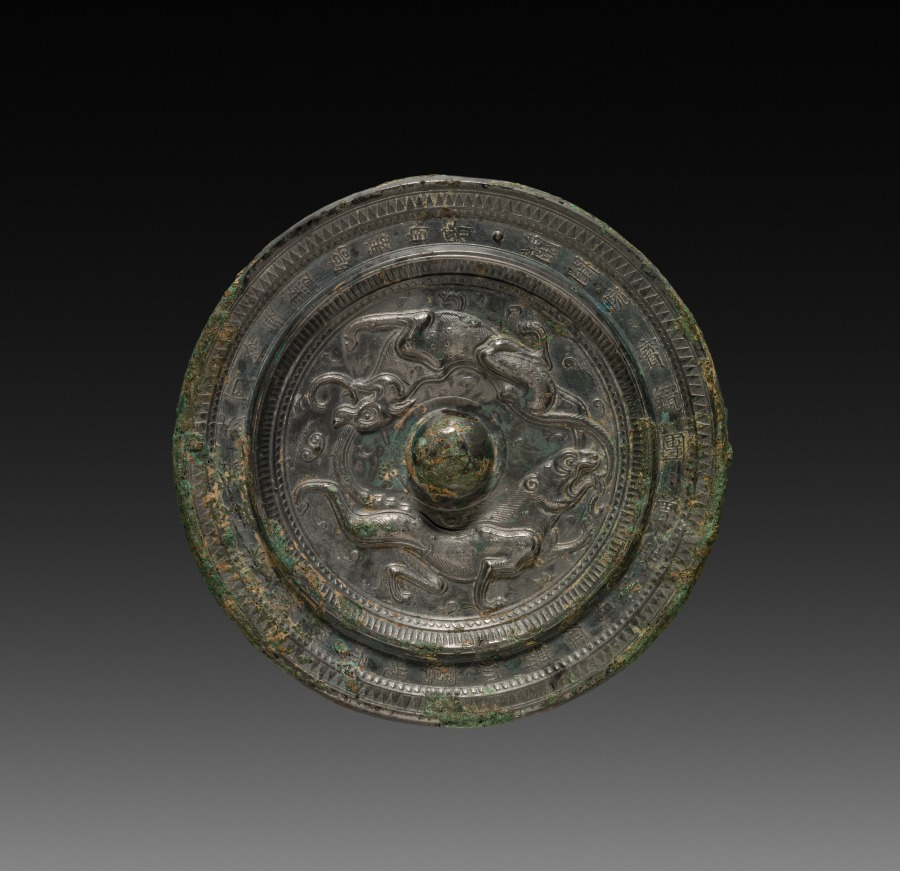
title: Mirror with Paired Felines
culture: China, Sui dynasty (581-618) - Tang dynasty (618-907)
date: late 500s–600s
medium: bronze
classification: Metalwork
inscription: The maiden's chamber---bright and clear Her precious mirror---round It has doubled both her eyes As she danced with the lonely phoenix. Its light flows over her powdered face, painted brow Diffusing radiance upon her silken gauze While with infinite delicacy She demurely glances at herself.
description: The two leopard-like creatures stalking each other around the knob of this mirror display a naturalistic animal style that emerged with the Sui and Tang unification of China. Their constrained energy contrasts markedly with the reserved image of a young woman described in the encircling poetic inscription: The maiden's chamber—bright and clear Her precious mirror—round It has doubled both her eyes As she danced with the lonely phoenix. Its light flows over her powdered face, painted brow Diffusing radiance upon her silken gauze While with infinite delicacy She demurely glances at herself. Unlike the tightly integrated Han mirrors, examples of the Sui and Tang are typically inscribed with romantic verses that bear no relation to their accompanying designs.